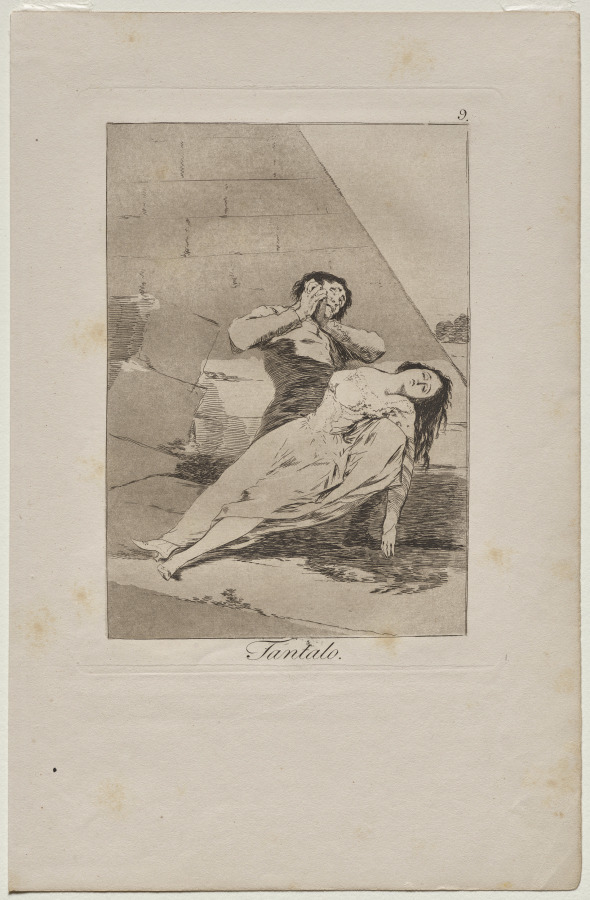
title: Tantalus, Plate 9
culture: Spain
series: Los Caprichos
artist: Francisco de Goya (Spanish, 1746–1828)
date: 1799 (printed c. 1855)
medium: etching and aquatint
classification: Print